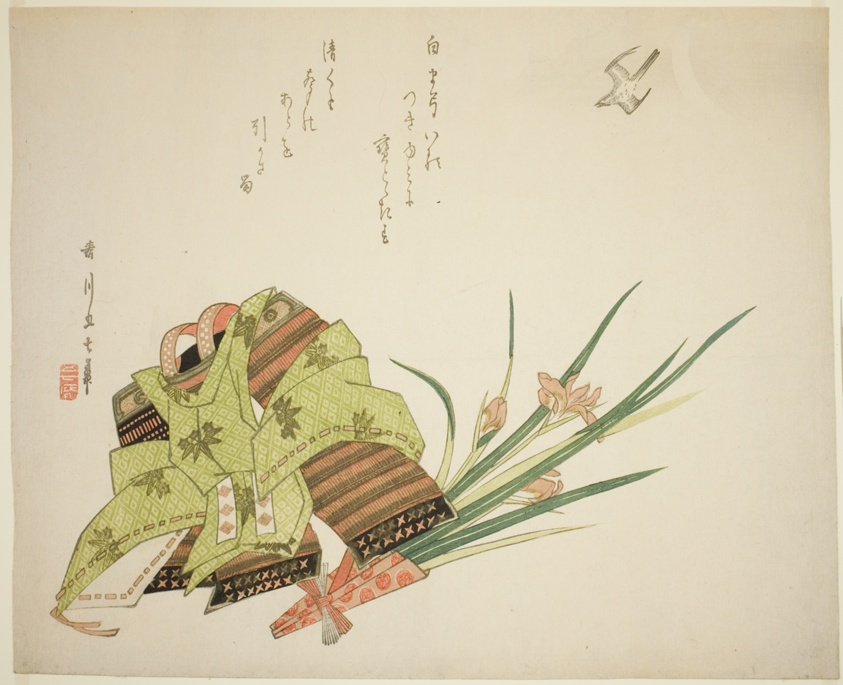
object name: Print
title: Crescent Moon with Flying Little Cuckoo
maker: Harukawa Goshichi (Japanese, 1776-1831)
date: 1825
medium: Color woodblock print; surimono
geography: Japan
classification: woodblock print; print; asian art